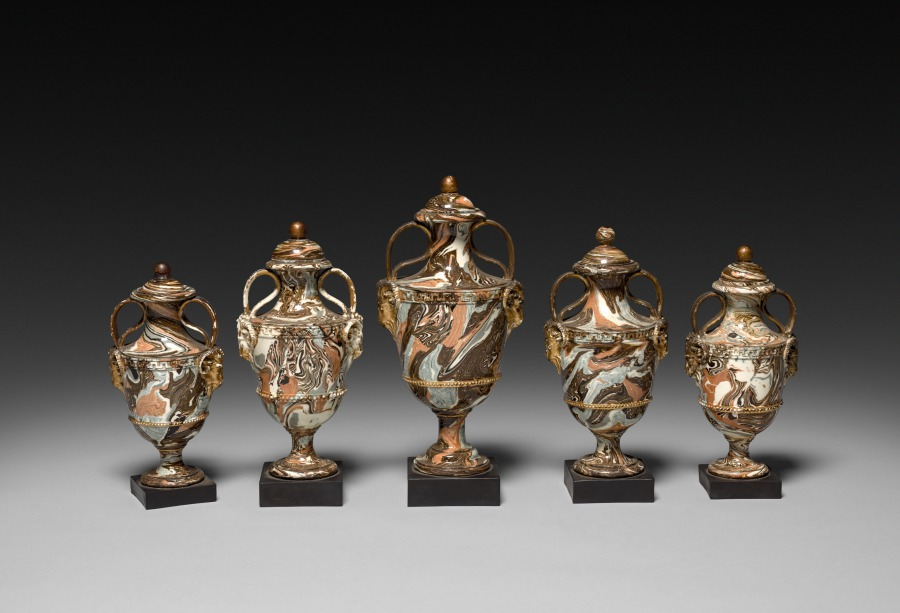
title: Urn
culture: England, late 18th or 19th century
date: late 1700s - 1800s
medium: earthenware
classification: Ceramic